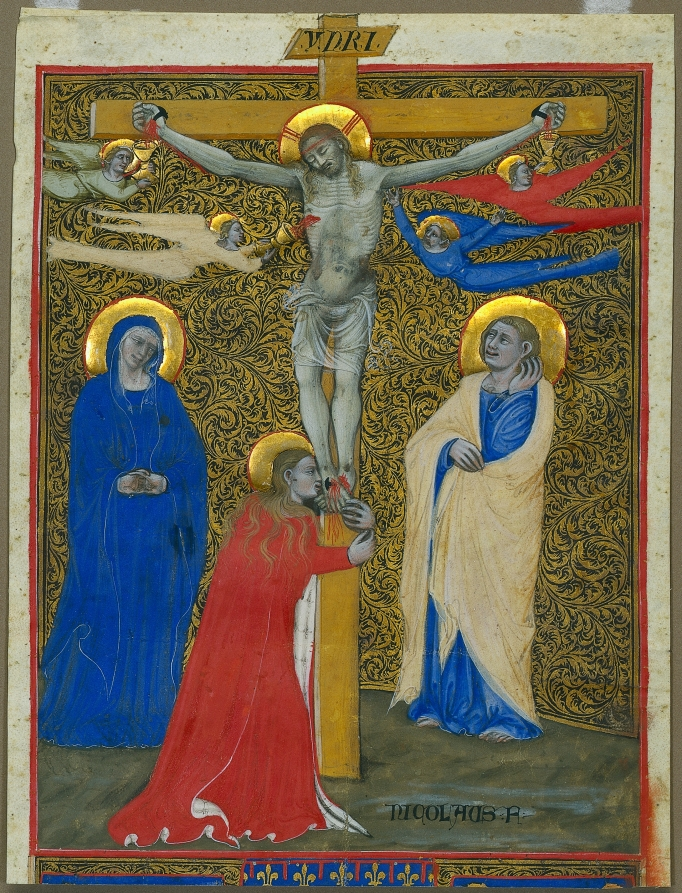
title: Single Leaf from a Missal: The Crucifixion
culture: Italy, Bologna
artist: attributed to Nicolò da Bologna (Italian, c. 1325–1403)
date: c. 1390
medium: ink, tempera, and gold on vellum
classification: Manuscript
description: Symbolizing the Eucharist, this leaf depicts angels holding chalices to collect blood from Christ's five wounds.